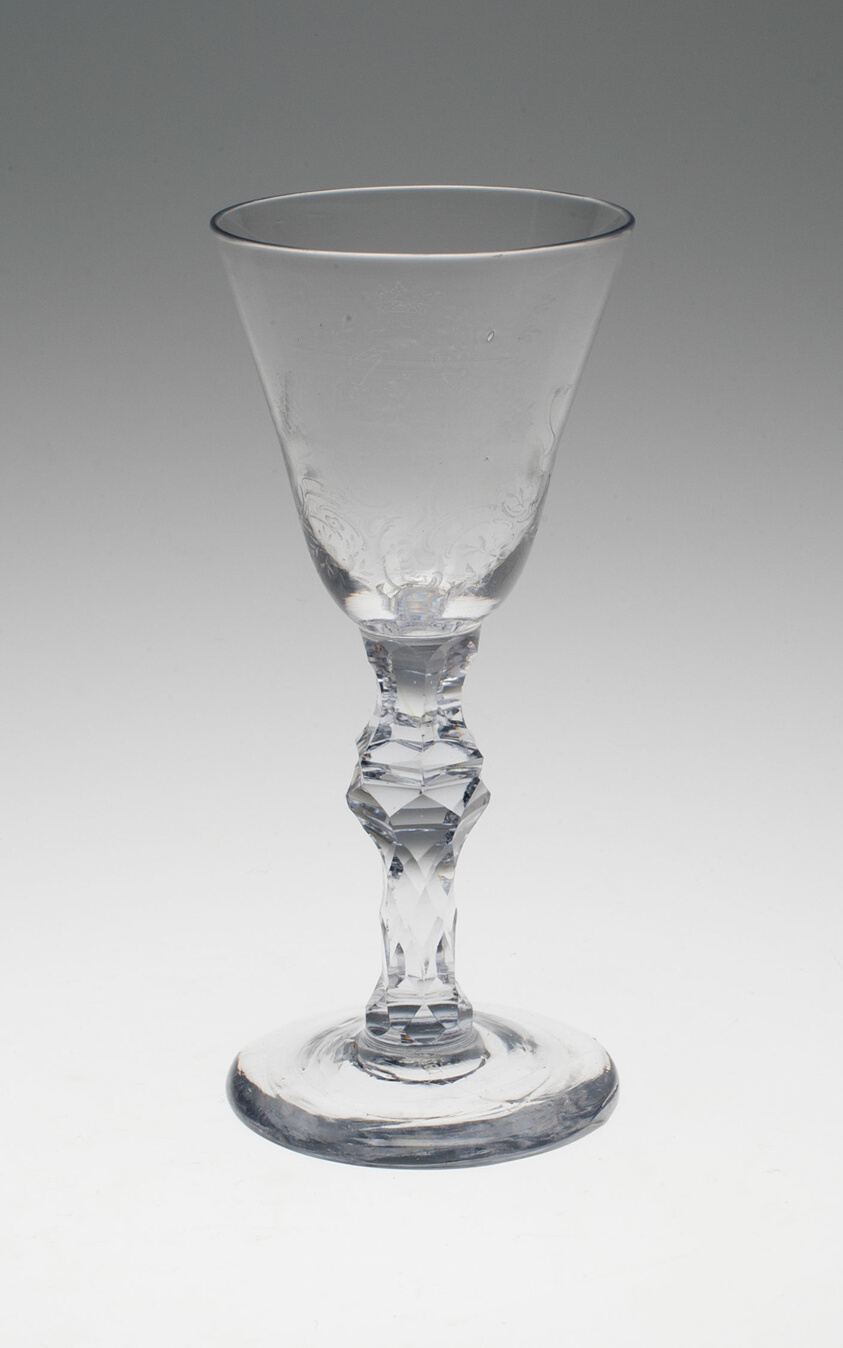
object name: Glass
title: Wine Glass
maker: England or Netherlands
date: c. 1760/80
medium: Glass; cut and stipple engraved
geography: England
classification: drinking vessel; glass; european decorative arts